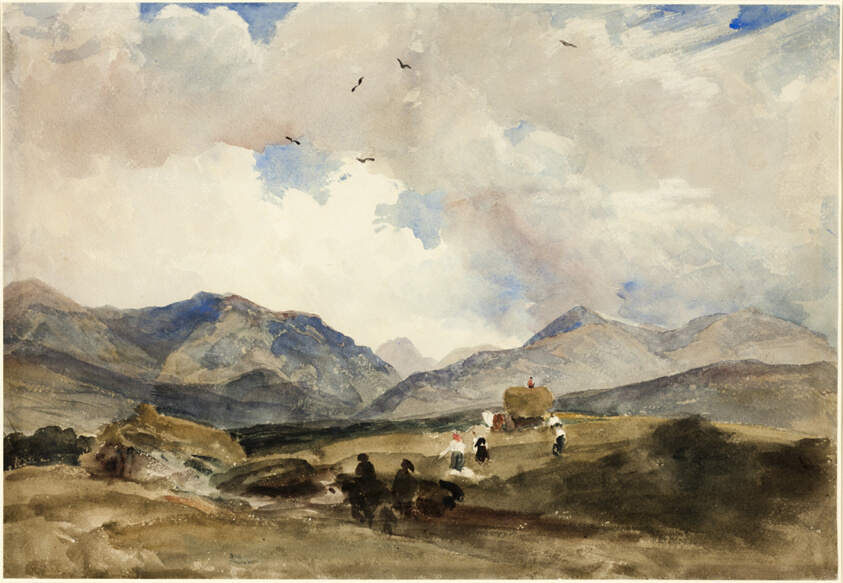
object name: Drawing and Watercolor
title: In Wales between Bangor and Capel Curig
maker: Peter De Wint (English, 1784-1849)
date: 1830s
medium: Watercolor, over traces of graphite on ivory wove paper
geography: London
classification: paper; watercolor; prints and drawing